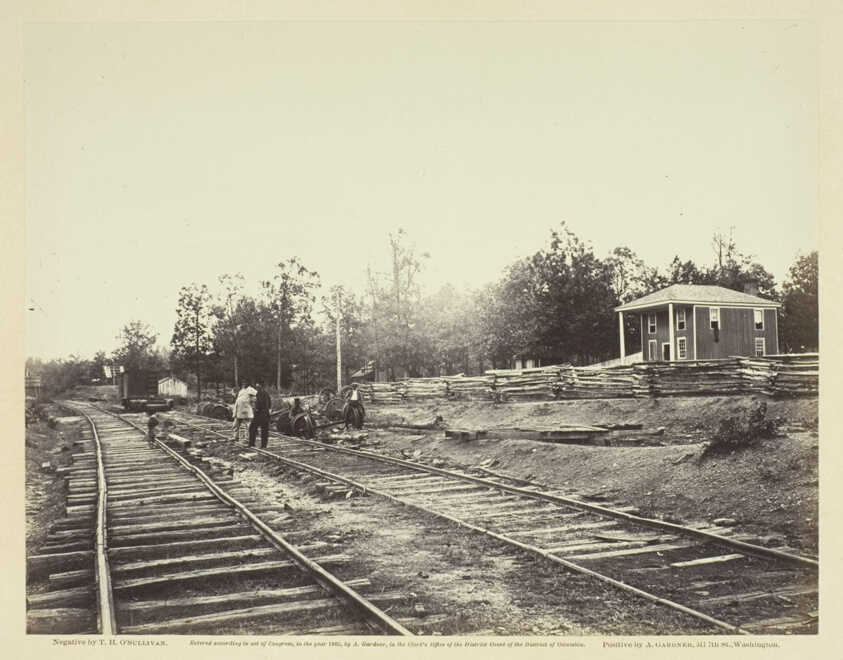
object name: Photograph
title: Appomattox Station, Virginia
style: 19th century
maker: Timothy O'Sullivan (American, born Ireland, 1840–1882)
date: April 1865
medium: Albumen print, pl. 97 from the album "Gardner's Photographic Sketch Book of the War, Volume II" (1866)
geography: United States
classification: photograph; albumen silver print; photography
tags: Collected by Hugh Edwards, Gardner's Photographic Sketch Book